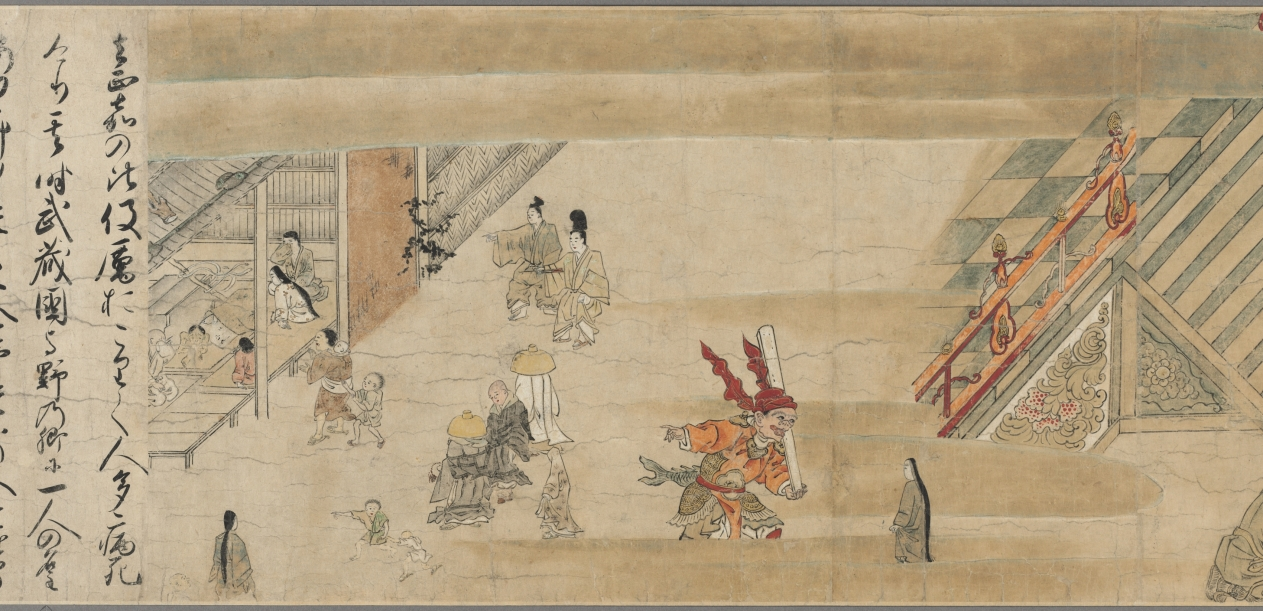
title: The Illustrated Miraculous Origins of the Yūzū Nenbutsu School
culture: Japan, Kamakura period (1185–1333)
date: early 1300s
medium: Handscroll; ink, color, and gold on paper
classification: Painting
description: This painting is the second of a set of two illustrated handscrolls. The first scroll depicts the biography of the Japanese Buddhist monk Ryōnin. This scroll begins with scenes of Ryōnin’s death and relates episodes illustrating the efficacy of following his teachings. Ryōnin asserted the total interconnectedness of all things and the spiritual benefit of chanting the name of the Buddha Amida for one another.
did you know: The other scroll from this two-scroll set belongs to the Art Institute of Chicago.